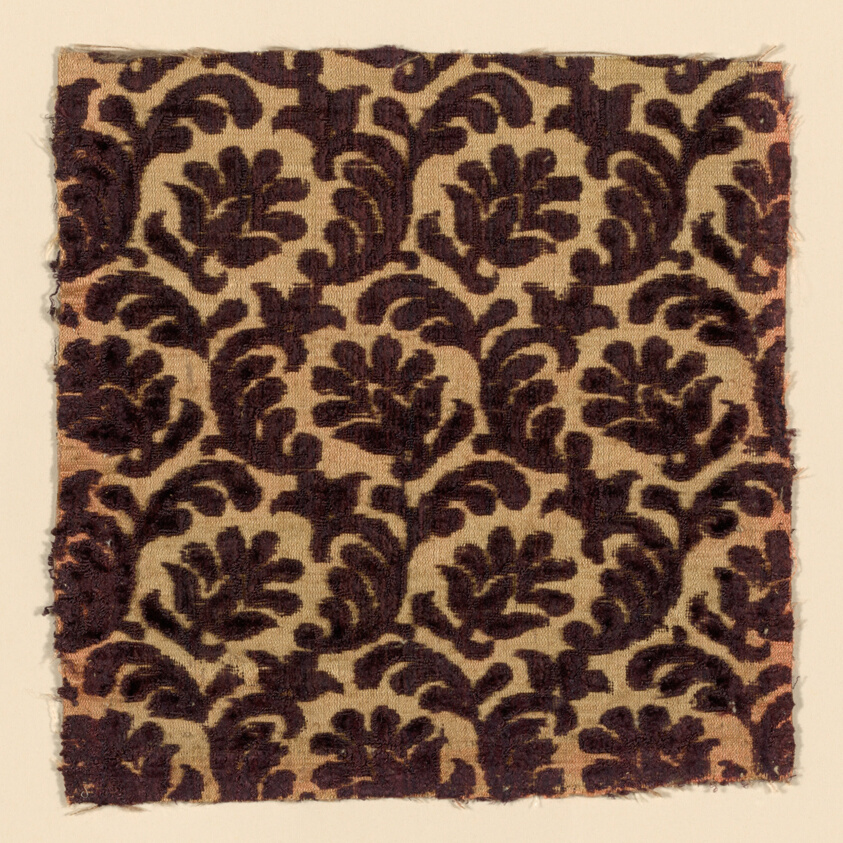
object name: Textile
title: Fragment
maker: Italy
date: 1601/25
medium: Silk, cut, uncut, and voided velvet against satin weave foundation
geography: Italy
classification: textile; weaving - velvet; weaving